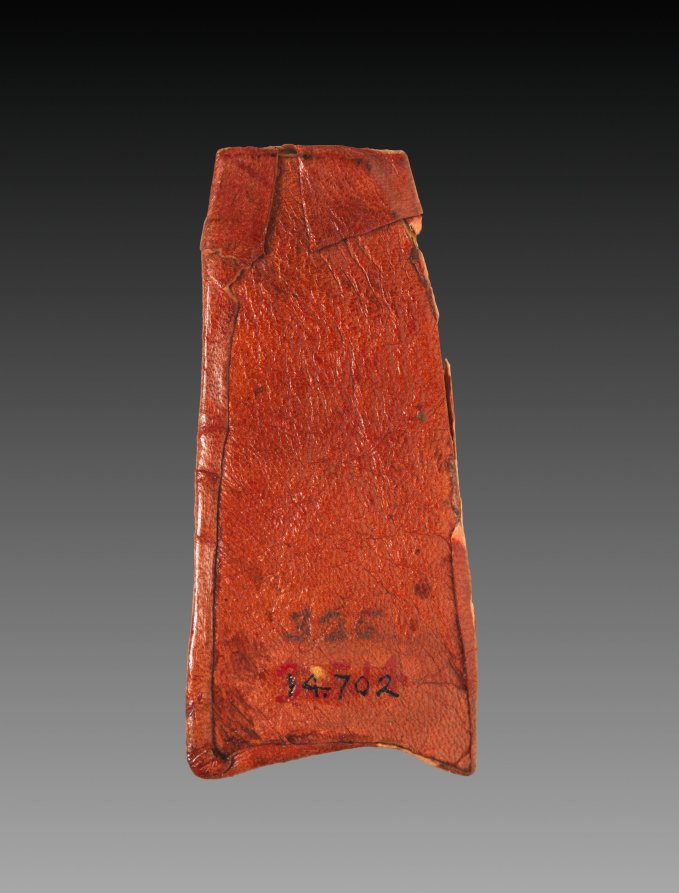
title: Tab from Mummy Band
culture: Egypt, Third Intermediate (1069–715 BCE), Dynasty 22, reign of Osorkon I (992–887 BCE)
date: 945–715 BCE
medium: stained leather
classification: Funerary Equipment